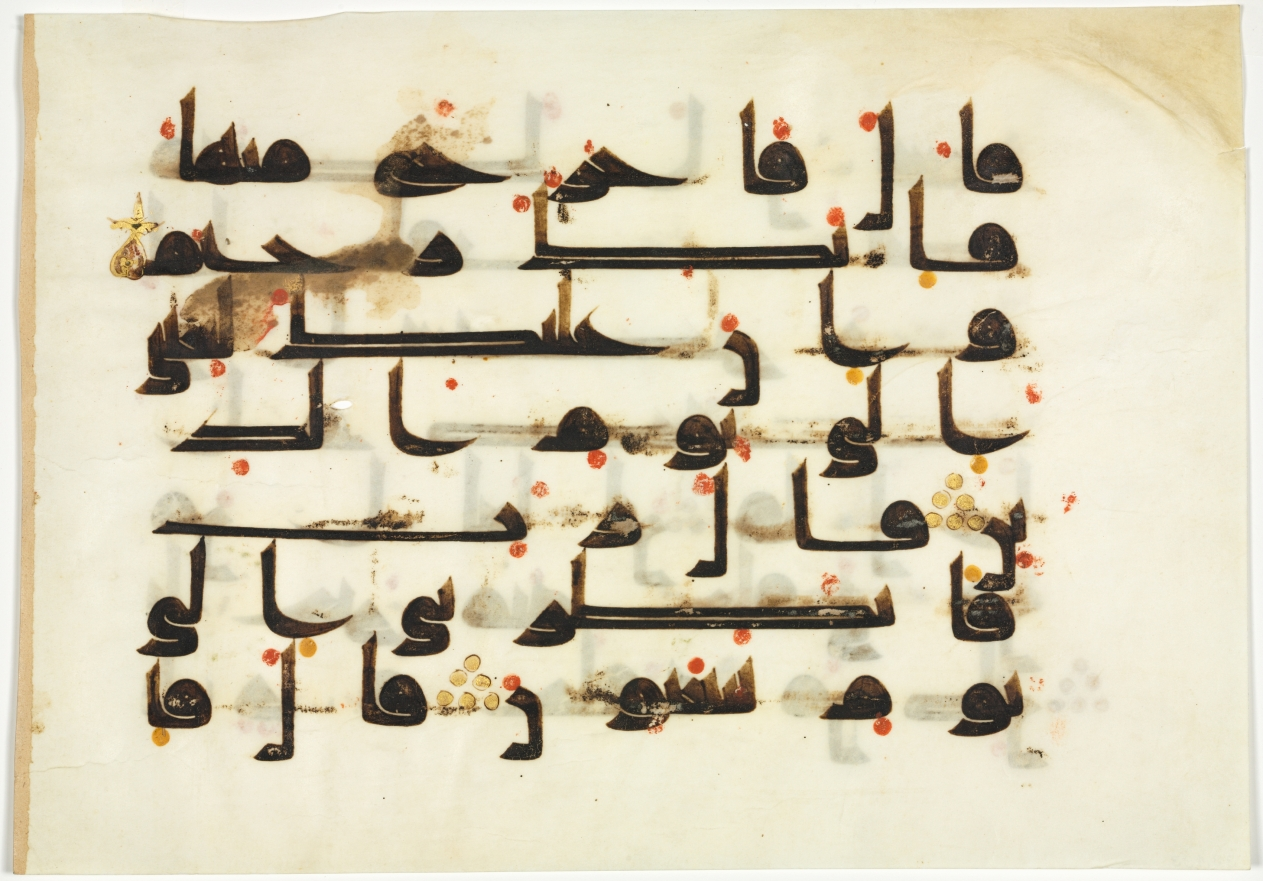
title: Folio from a Qur'an (verso)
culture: Probably Egypt, Abbasid period (750–1258)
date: 800s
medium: Opaque watercolor, ink, and gold on parchment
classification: Drawing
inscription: Sura al-Saad (38: part 77-80). Script: Kufi (seven lines to a page)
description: The sacred book of Islam, the Qur'an is believed by Muslims to be a literal transcription of the word of God, spoken in Arabic to the Prophet Muhammad (died 632). In order to convey the importance of the divine word, Arabic calligraphy—sometimes highly elaborate and embellished with gold—was used to create copies of the Qur'an. This folio was written in the oldest style of Arabic calligraphy, called Kufic script, used in earliest surviving copies of the Qur'an. The wide format of the page is well suited to this style of Kufic that has elongated, horizontal strokes. Vowels are indicated by red dots, and the triangles of gold dots mark the end of each verse. The text on the recto recounts an argument between God and Lucifer. Proud Lucifer declares himself superior to humans because he was formed from fire, while humans were molded from clay. In the verses on the verso, God casts Lucifer out of heaven as punishment for his pride.